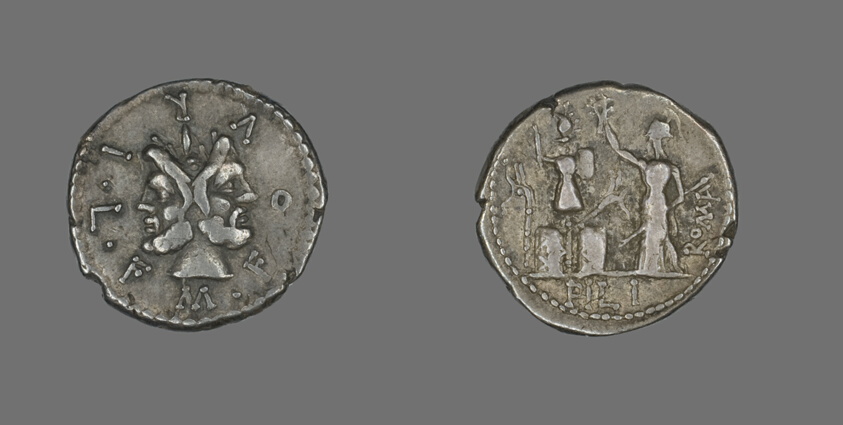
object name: Coin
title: Denarius (Coin) Depicting the God Janus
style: roman (ancient, style or period), ancient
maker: Roman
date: 119 BCE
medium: Silver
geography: Roman Empire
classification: coin; ancient art